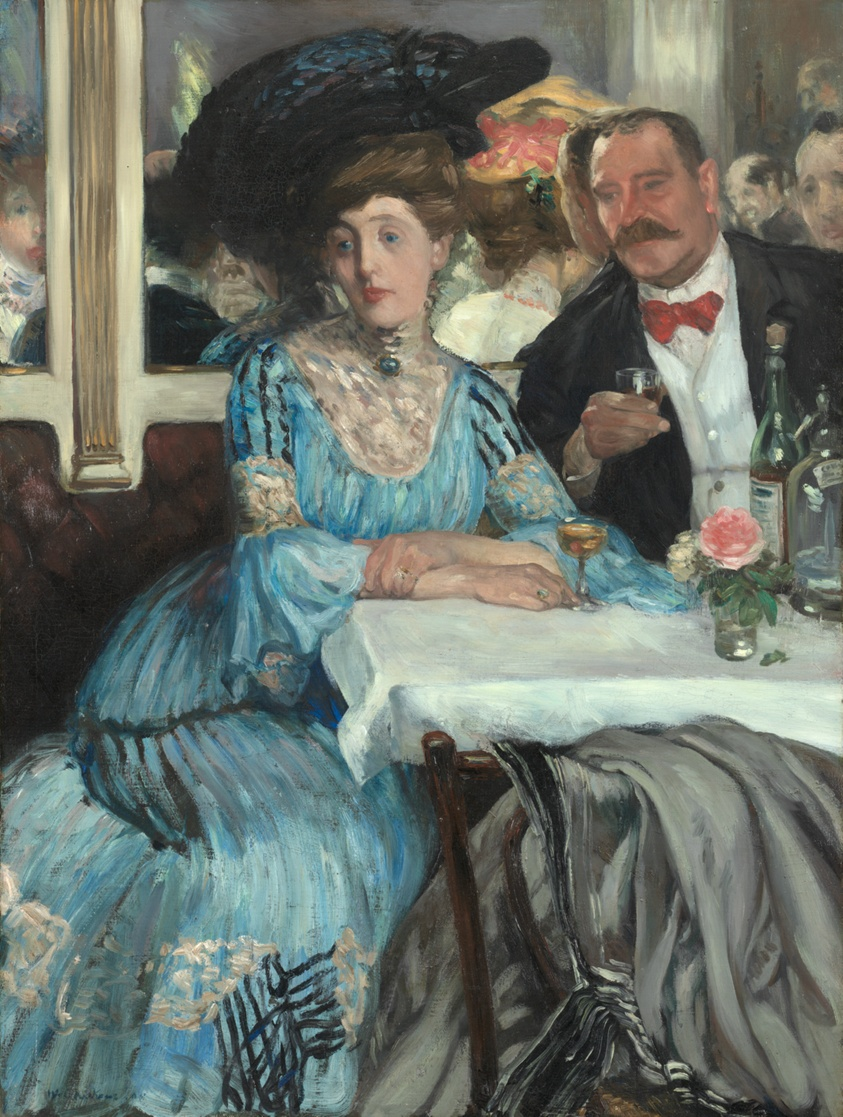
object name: Painting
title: At Mouquin's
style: Impressionism, Modernism, Ashcan School, Realism, 20th Century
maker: William Glackens; American, 1870–1938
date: 1905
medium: Oil on canvas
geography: United States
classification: oil on canvas; painting; modern and contemporary art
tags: fashion, women, men, night scenes, leisure, urban life, Century of Progress, world's fairs, Chicago World's Fairs, dining, drinking, people, portraits